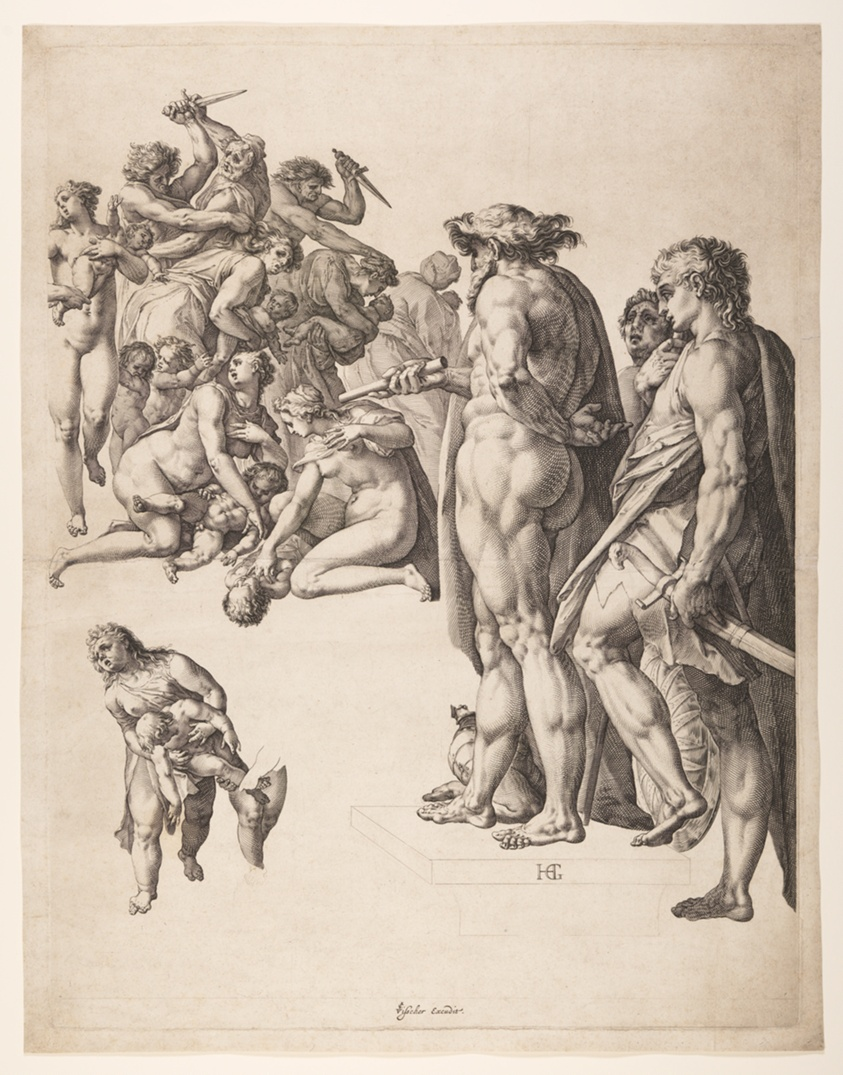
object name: Print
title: The Massacre of the Innocents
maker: Hendrick Goltzius (Dutch, 1558–1617)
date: c. 1585-86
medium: Engraving on ivory laid paper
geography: Netherlands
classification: engraving; paper; print; prints and drawing